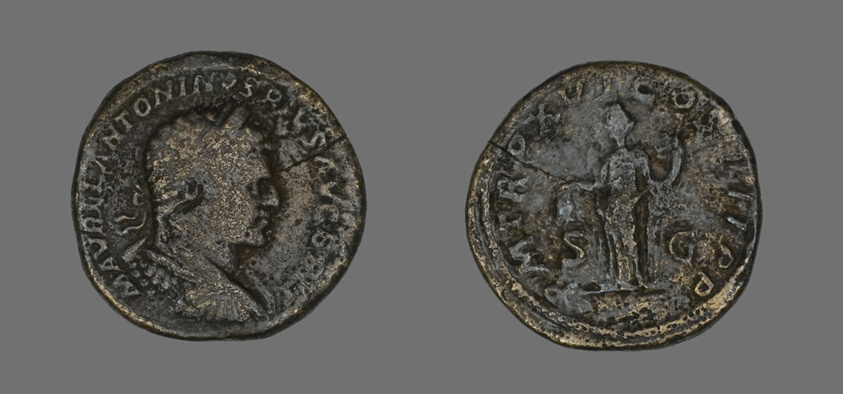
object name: Coin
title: Sestertius (Coin) Portraying Emperor Caracalla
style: roman (ancient, style or period)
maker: Roman, minted in Rome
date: 213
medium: Bronze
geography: Roman Empire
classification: coin; ancient art